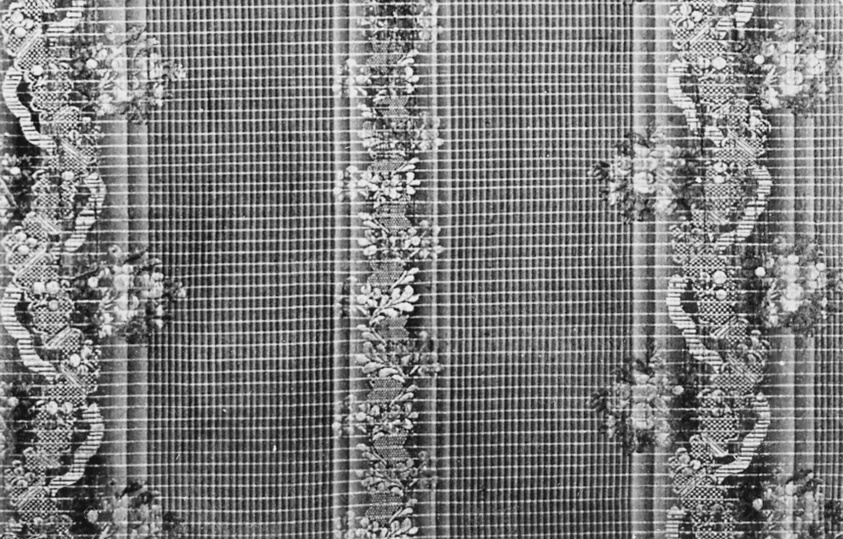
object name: Textile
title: Fragment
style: louis xvi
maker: France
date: Louis XVI period, 1774–1792, late 18th century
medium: Silk, brocaded plain compound cloth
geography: France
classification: textile; weaving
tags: flowers, checkerboards, ribbon